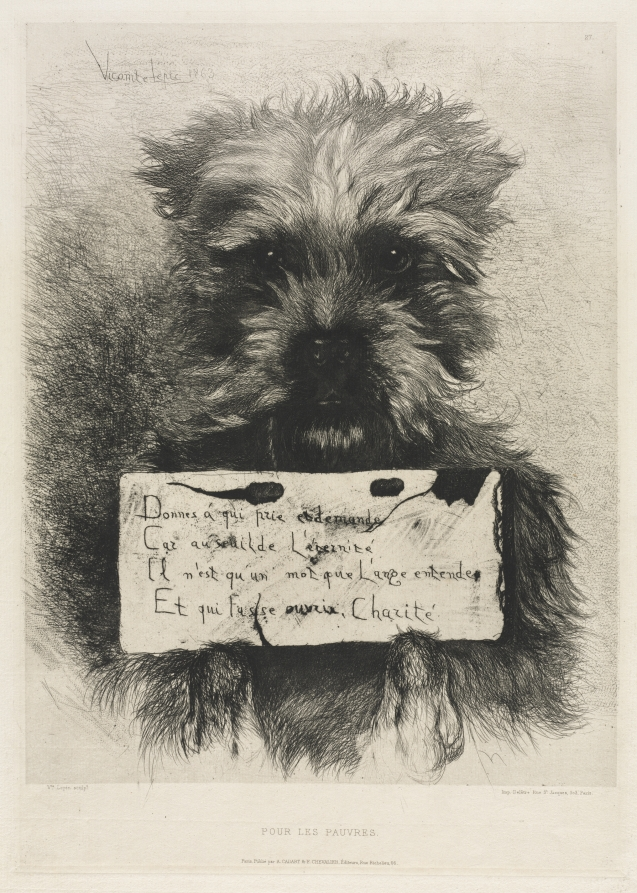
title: For the Poor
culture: France, 19th century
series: Portfolio No. 6, Société des Aquafortstes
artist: Ludovic Napoléon, Vicomte Lepic (French, 1839–1889)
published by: Cadart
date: 1863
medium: etching and roulette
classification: Print